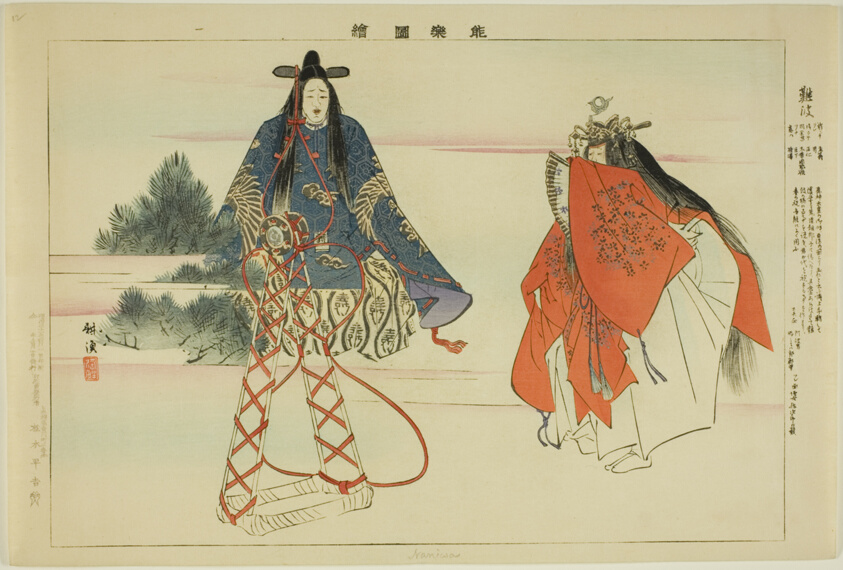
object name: Print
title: Naniwa, from the series "Pictures of No Performances (Nogaku Zue)"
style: Japanese (culture or style)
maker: Tsukioka Kogyo; Japanese, 1869-1927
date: 1898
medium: Color woodblock print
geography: Japan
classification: woodblock print; print; asian art